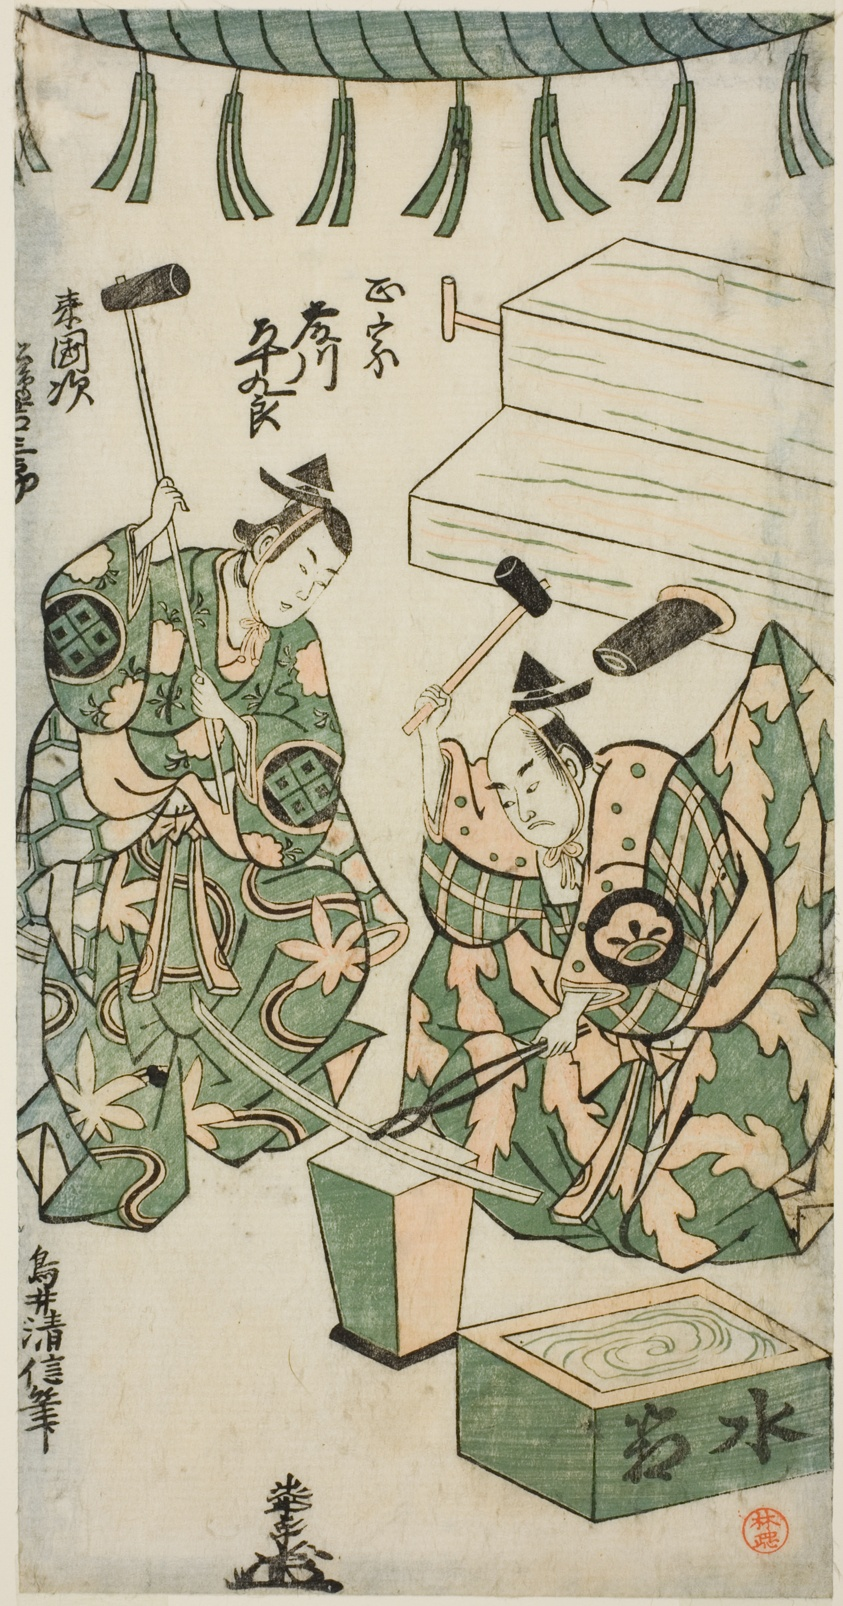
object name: Print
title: The Actors Fujikawa Heikuro as Masamune and Matsushima Kichisaburo as Rai Kunitsugu in the play "Shin Usuyuki Monogatari," performed at the Nakamura Theater in the sixth month, 1746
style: Japanese (culture or style)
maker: Torii Kiyonobu II (Japanese, active c. 1725-61)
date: 1746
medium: Color woodblock print; hosoban, benizuri-e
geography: Japan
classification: woodblock print; print; asian art